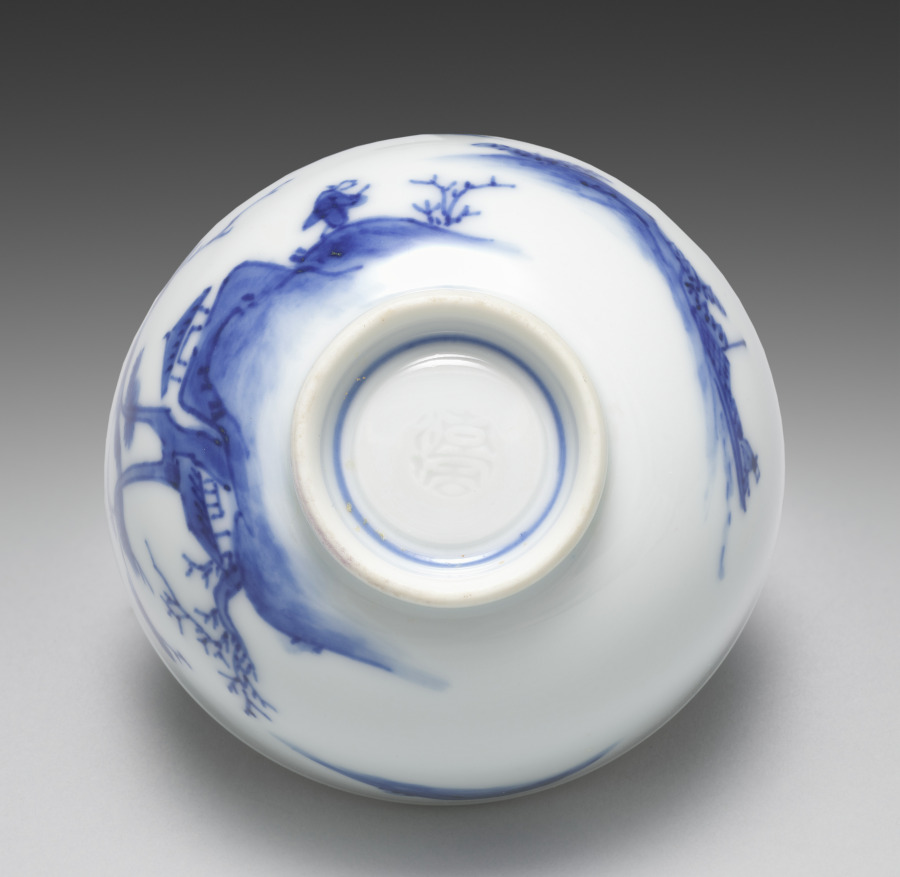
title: Teacup from Tea Set with Chinese Landscape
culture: Japan, Meiji period (1868–1912)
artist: Seifū Yohei III (Japanese, 1851–1914)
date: 1893–1914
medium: Porcelain with underglaze blue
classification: Ceramic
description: The theme of this sencha tea set is the Chinese scholar-recluse in an idyllic landscape. Each of the five teacups has a landscape with an architectural structure and some human activity. This tea set has a side-handled pot called a kyūsu, used for steeping, straining, and serving tea. Unlike some others, this set also has a yuzamashi, a container used to cool boiled water to just the right temperature for the best flavor when steeping. Seifū Yohei III’s painting teacher, Tanomura Chokunyū (1814–1907), made a visual record of famous sencha events that shows how these kinds of porcelains fit with objects such as a stove and kettle to form a complete set of utensils for tea preparation, and with ensembles of decorative objects meant to inspire creativity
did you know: This teacup shows a man with a staff walking away from a residence toward a boat, loaded with what might be a musical instrument wrapped for travel.